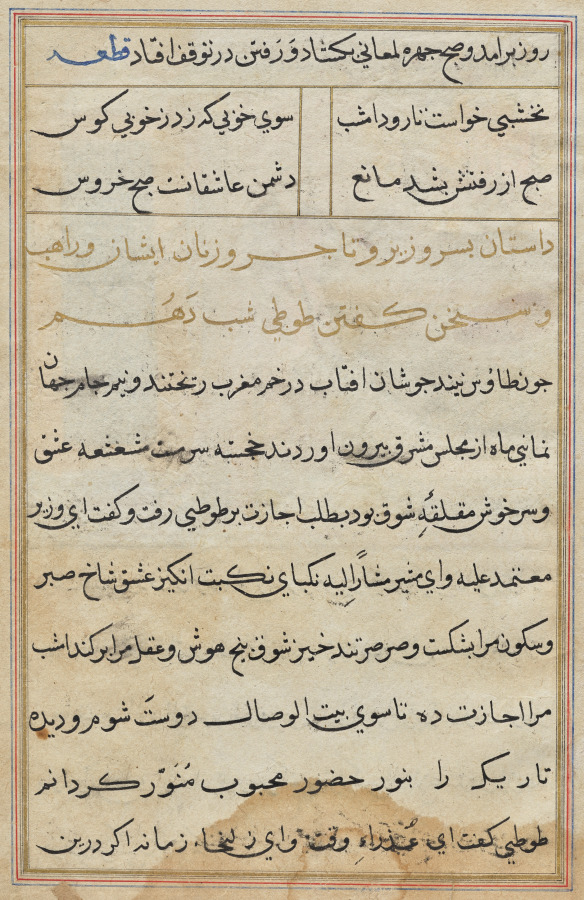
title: Page from Tales of a Parrot (Tuti-nama): text page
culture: Mughal India, court of Akbar (reigned 1556–1605)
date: c. 1560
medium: gum tempera, ink, and gold on paper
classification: Painting